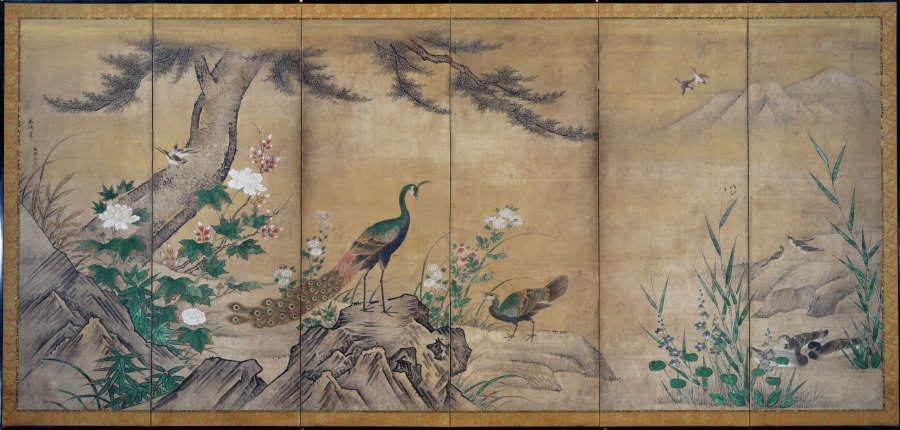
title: Birds and Flowers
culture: Japan, Momoyama period (1573–1615)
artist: attributed to Kano Mitsunobu (Japanese, 1565–1608)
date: late 1500s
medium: One of a pair of six-panel folding screens; ink, color, and gold on paper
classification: Painting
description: The landscape depicted in this pair of screens follows a seasonal progression from right to left, starting with the blossoming plum of early spring and ending with late autumn peonies. A variety of smaller birds are positioned throughout the scene, and a trio of swimming ducks is bracketed by early summer irises and early autumn bellflowers at the center. While some raptors (birds of prey) terrorize a pheasant and an egret (a waterfowl) to the right, a peacock and peahen converse to the left. Hawks are associated with military prowess, while the peafowl suggest cultural prestige.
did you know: As masters of the Kano academic painting style, both Kano Shōei and Kano Mitsunobu favored Chinese-inspired subject matter, such as birds and flowers.